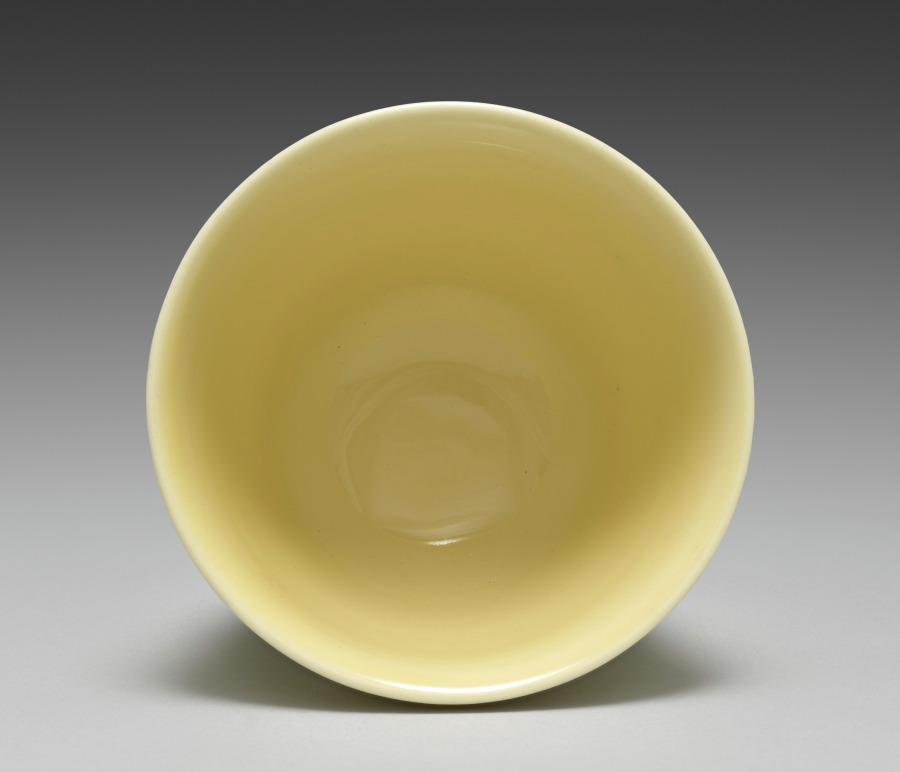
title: Cup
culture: Japan, Taishō period (1912–26) or Shōwa period (1926–89)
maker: Seifū Yohei IV (Japanese, 1872–1951)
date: 1914–46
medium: porcelain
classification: Ceramic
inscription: 清風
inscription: 清風造 【印】成山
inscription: 清風盧人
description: Like his father, Yohei IV also produced works with red or yellow monochrome glazes. His yellow-glazed works include this set of five drinking cups, a pair of sake pourers CMA 2022.216, and a sweets bowl molded into the shape of a chrysanthemum CMA 2022.218.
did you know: Seifū Yohei IV learned the ceramics industry from his father and painting from Tanomura Shosai.